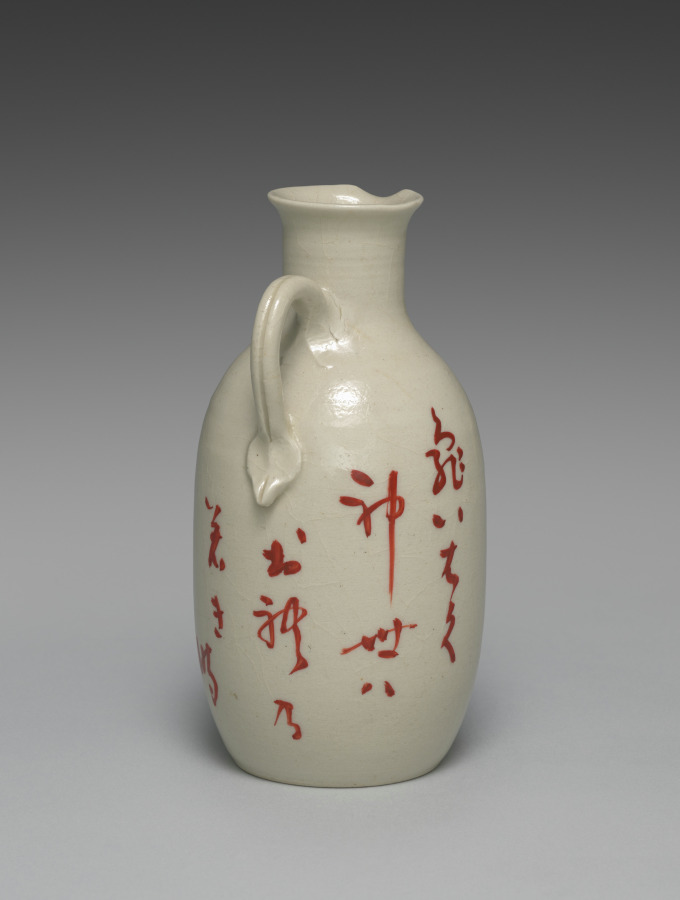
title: Tortoises Sake Pourer from Sake Pourers with Crane and Tortoises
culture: Japan, Meiji period (1868–1912)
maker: Seifū Yohei III (Japanese, 1851–1914)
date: 1893–1914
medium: One of a pair of sake flasks; porcelain with overglaze color enamel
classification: Ceramic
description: This flask has stencil-like paintings of three turtles—a young one with its parents—while the other in this pair has a crane with a leg raised. Cranes and turtles are well-recognized symbols of longevity in East Asia, with the turtle said to live for ten thousand years and the crane for one thousand. Each flask also has a poem on the back, one in Chinese and the other in Japanese. The latter, which appears on the turtle flask, reads kame iwaku kamiyo wa, ore no wakaki toki. The seventeen syllable poem begins with “turtle” and ends with “when I was young.” It can be translated as, “the turtle said the world of the gods began when I was young.”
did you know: This pair of seemingly humble sake pourers celebrate longevity and delight in a literary tradition that embraces multiple forms of poetic expression.